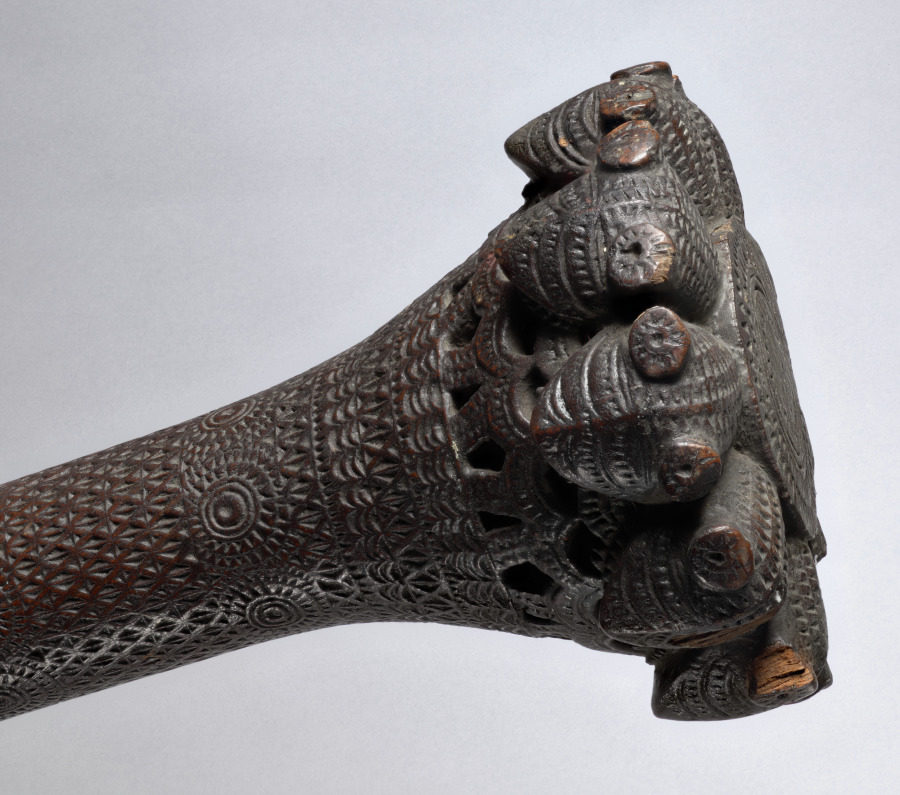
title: Ceremonial Paddle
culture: Polynesia, Ra'ivavae, Austral Islands, 18th-19th Century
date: 1700s-1800s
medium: wood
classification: Sculpture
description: Fine, chip-carved patterns cover the blades and shafts of Austral Islands ceremonial paddles. Squatting human figures carved around the butt are called tiki tiki tangata, meaning man-gods. The shafts of early paddles are usually round in cross-section; 19th-century examples are sometimes square. The function of the intricately carved Austral Islands paddles is uncertain. They may have been displayed on ceremonial occasions, such as dances, pageants, ancestral rituals, or inaugurations.